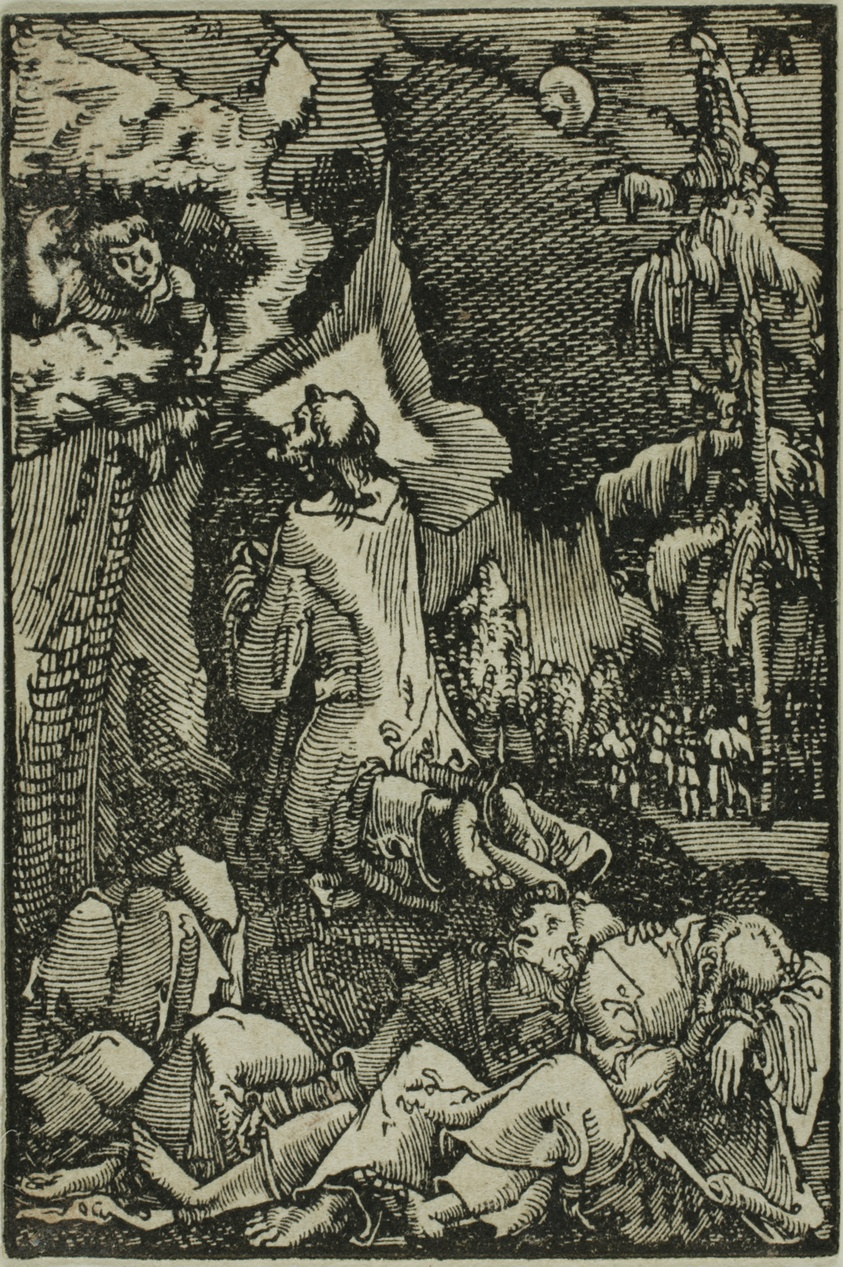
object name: Print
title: The Agony in the Garden, from The Fall and Redemption of Man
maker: Albrecht Altdorfer (German, c.1480-1538)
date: 1513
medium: Woodcut in black on ivory laid paper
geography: Germany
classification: wood engraving; print; prints and drawing